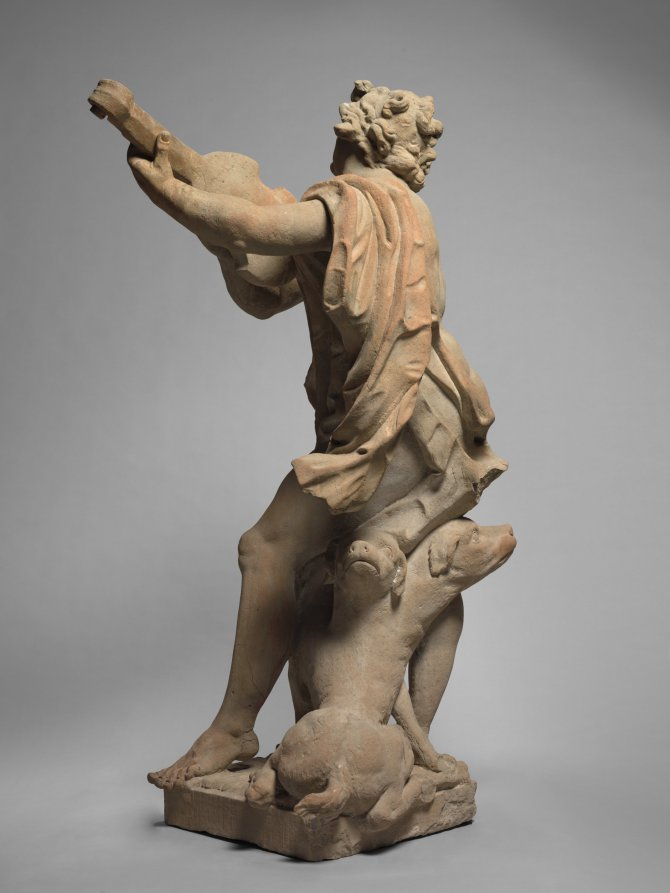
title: Orpheus and Cerberus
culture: Germany, near Bamberg, 18th century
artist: Ferdinand Tietz (Austrian, 1708–1777)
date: c. 1765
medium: sandstone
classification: Sculpture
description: This work was one of numerous sculptures Tietz created for the gardens of Schloss Seehof, near Bamberg in Bavaria (Germany), the summer residence of the Prince Bishops of Bamberg. The exaggerated forms of Orpheus's face and musculature caricature the idealized proportions of classical sculpture. A further parody exists with his companion: the usually terrifying hound Cerberus is here nothing more than a docile puppy, sitting calmly at Orpheus's feet. Meant to be viewed outdoors, on a high pedestal and from a distance, this work is less finely detailed than sculptures Tietz made for indoor settings at Seehof.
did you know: Taught to play the lyre by the Greek god Apollo, Orpheus's legendary musical abilities had the power to charm animals.